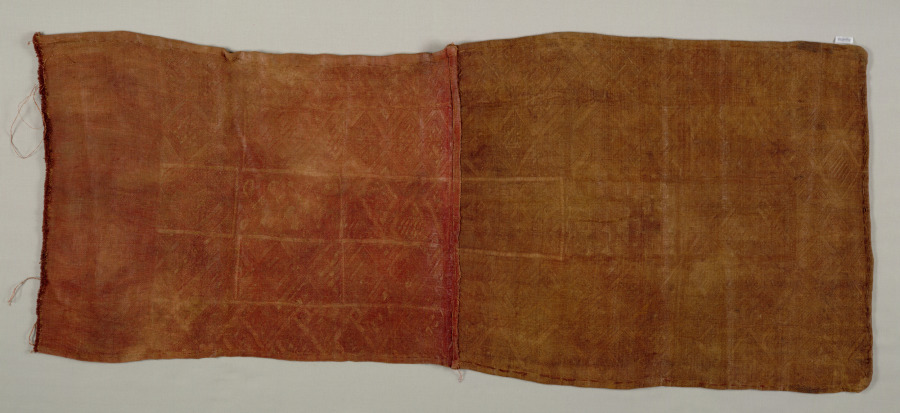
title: Embroidered Raffia Pile Cloth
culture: Africa, Central Africa, Democratic Republic of Congo, Kuba peoples, 20th century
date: 1900s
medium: Raffia and dye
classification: Textile